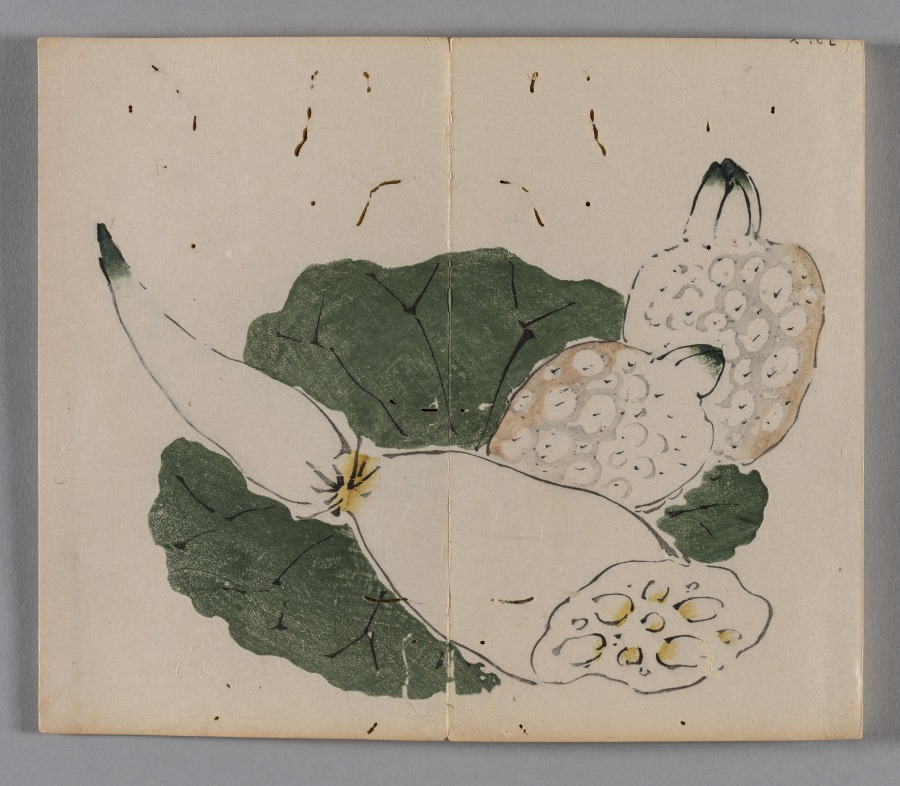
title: Ten Bamboo Studio Painting and Calligraphy Handbook (Shizhuzhai shuhua pu): Fruit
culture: China, Qing dynasty (1644-1911)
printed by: Hu Zhengyan (Chinese, c. 1584–1674)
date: 1633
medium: Woodblock-printed book; ink and colors on paper; first edition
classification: Print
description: Color printing reached a level of perfection in the early 1600s, as seen in this Ten Bamboo Studio Collection of Calligraphy and Painting and the Mustard Seed Garden Manual of Painting (printed 1679 and 1701). The painterly quality, precision in registering (aligning) the woodblocks, and harmonious colors made them the most successful color print editions in Chinese history. Both editions were printed and compiled in Nanjing, spread nationwide, and had a great impact on the arts in Japan and Korea.